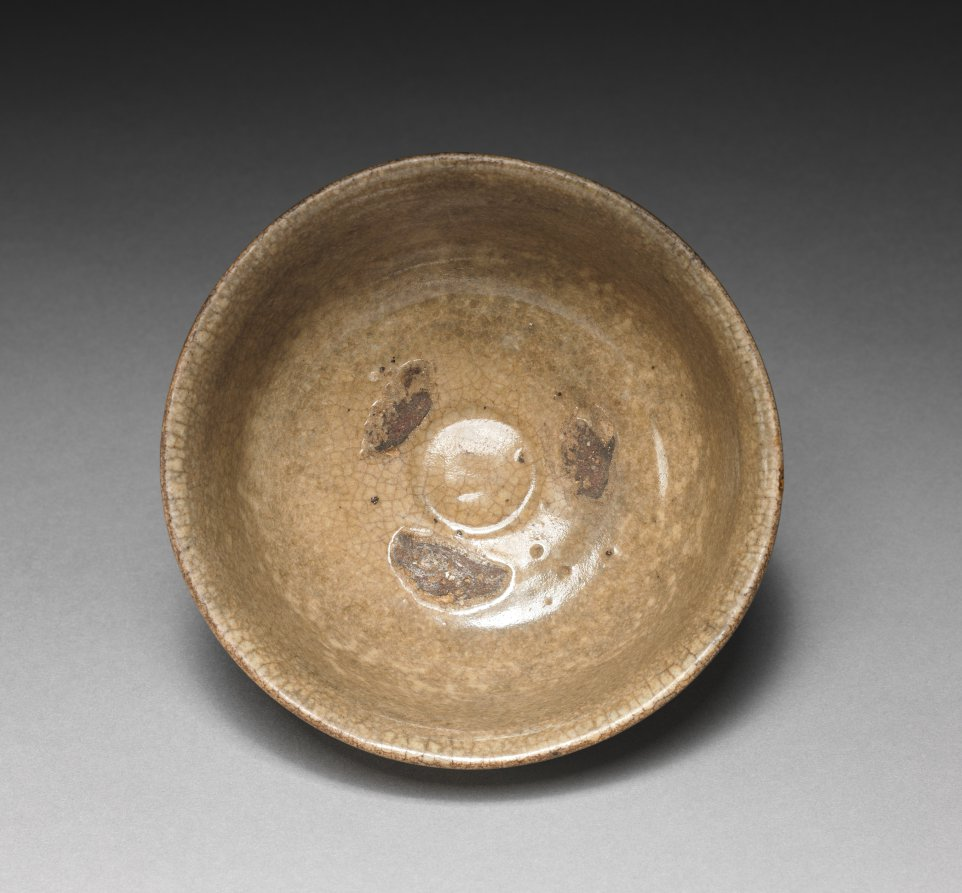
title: Bowl with White-slip Decorations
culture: Korea, Joseon dynasty (1392–1910)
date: 1500s–1600s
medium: glazed stoneware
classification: Ceramic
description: This type of wide-mouthed bowl was used every day in Korea, not exclusively for tea drinking. But when it was introduced to Japan around the early 1500s, its imperfect appearance, which evokes the aesthetics of wabi-sabi, caused it to be repurposed as a tea bowl. Korean tea bowls were circulated as a item of foreign luxury among Japanese military elites. Many Korean potters were abducted during the Japanese invasions (1592–98). Some settled there, and ended up leading the development of ceramic industry in Japan.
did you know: This type of humble tea bowl was highly praised among Japanese collectors for its imperfect beauty.